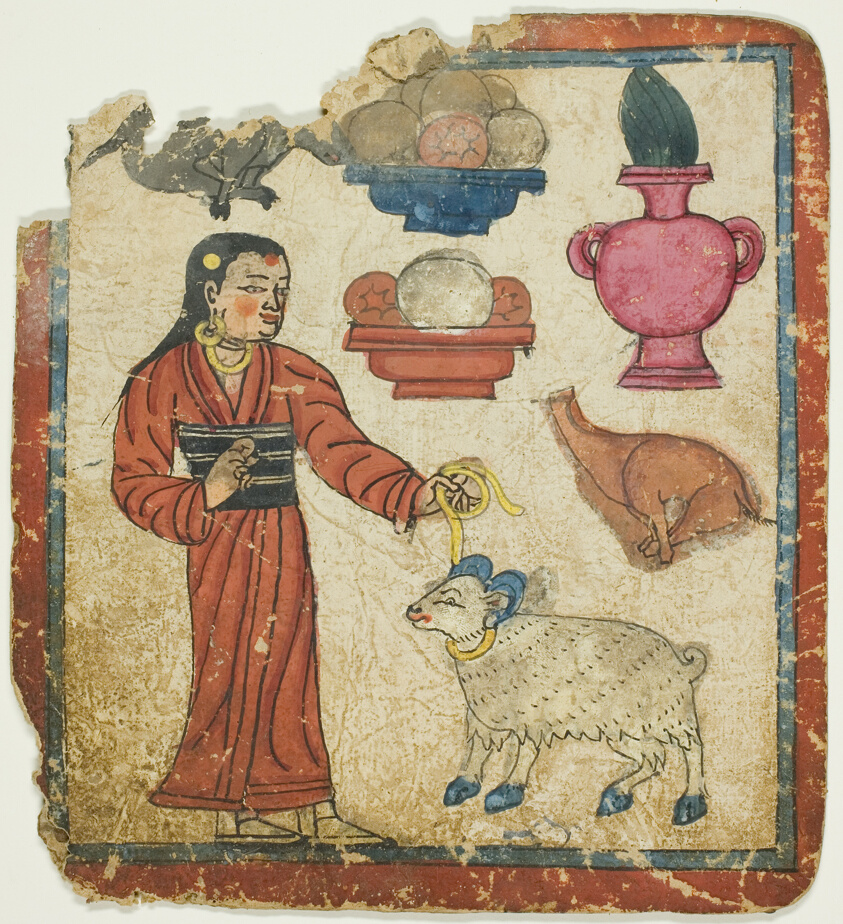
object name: Painting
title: Presentation of Offerings, from a Set of Initiation Cards (Tsakali)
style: Himalayan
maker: Southern Tibet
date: 14th/15th century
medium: Ink and watercolor on paper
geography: Tibet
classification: ink; painting